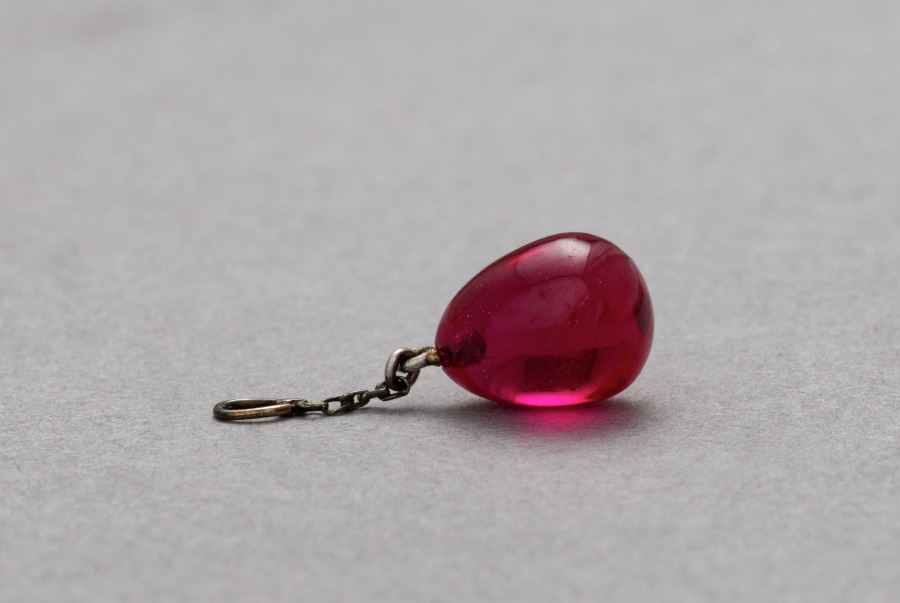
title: Ruby or Pink Sapphire Surprise from the Lapis Lazuli Easter Egg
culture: Russia, St. Petersburg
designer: attributed to Peter Carl Fabergé (Russian, 1846–1920)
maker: attributed to House of Fabergé (Russian, 1842–1918)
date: c. 1885–90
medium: gold, enamel, lapis lazuli, pearls, diamonds, rubies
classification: Miscellaneous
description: This Easter egg, like the subsequent ones produced by Fabergé for the imperial family, contains a surprise when opened. In this case, the egg opens to display a yellow enameled cover, resembling an egg yolk, which then opens to reveal a tiny replica of the Russian imperial crown, containing either a ruby or a pink sapphire suspended on a chain.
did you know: This tiny ruby or pink sapphire dangles from a diamond encrusted crown surprise, which is a replica of the Russian imperial crown made for Empress Catherine the Great in the 1700s.